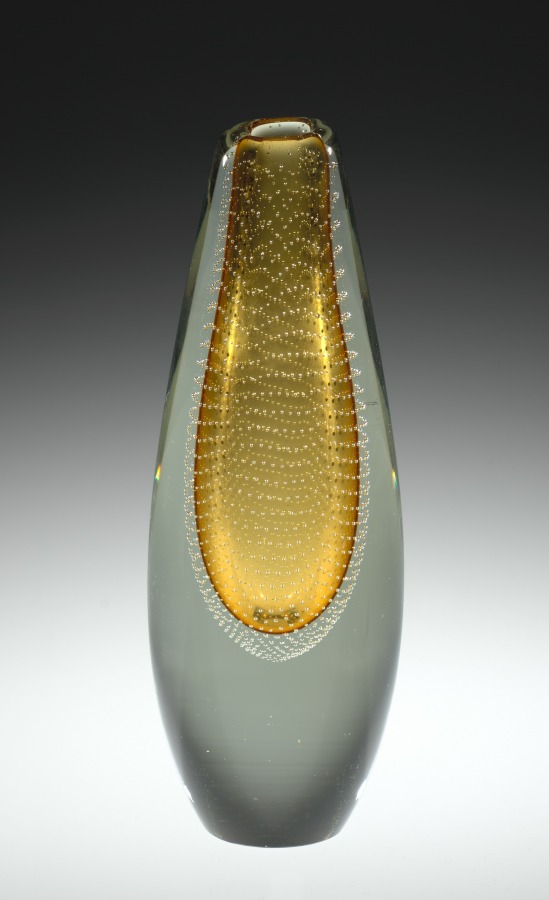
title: Vase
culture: Finland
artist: Gunnel Nyman (Finnish, 1909–1948)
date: 1950s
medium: glass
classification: Glass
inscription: inscribed on bottom: NYMAN/NUUTAJARVI/NOTSJO-(3?)(9?).